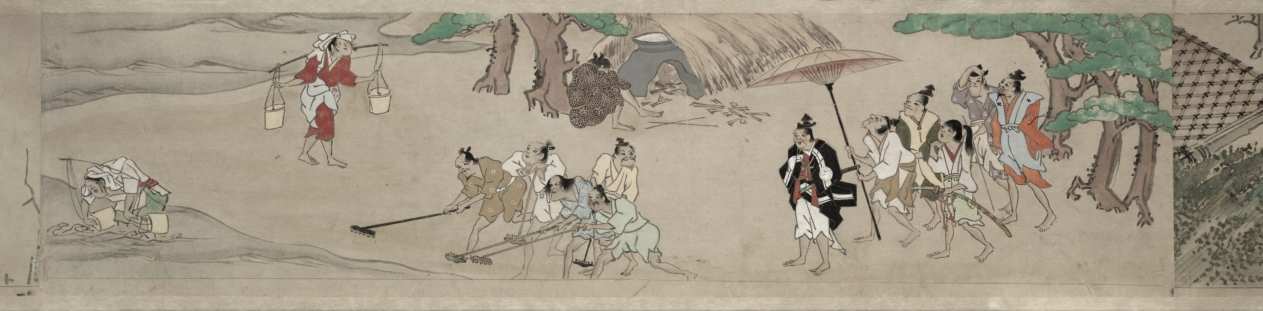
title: The Saltmaker's Story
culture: Japan, Edo period (1615–1868)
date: early 1600s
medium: One of a pair of handscrolls; ink, color, and gold on paper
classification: Painting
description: Once read and copied by girls at New Year’s celebrations and included in dowries, The Saltmaker’s Story is a rags-to-riches tale in which daughters are gifts from the gods. Despite his simple outlook, the main character progresses from humble roots as an associate at Kashima Shrine to the elite status of grandfather of the emperor through the intervention of the Kashima deity. The Saltmaker’s Story is traditionally presented in a set of three scrolls, but the text of this set has been removed by a previous owner, who remounted the illustrations as a pair. The paintings of this one take us from right to left through the first half of the tale.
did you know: This handscroll originally had texts before its paintings, but the texts were removed.